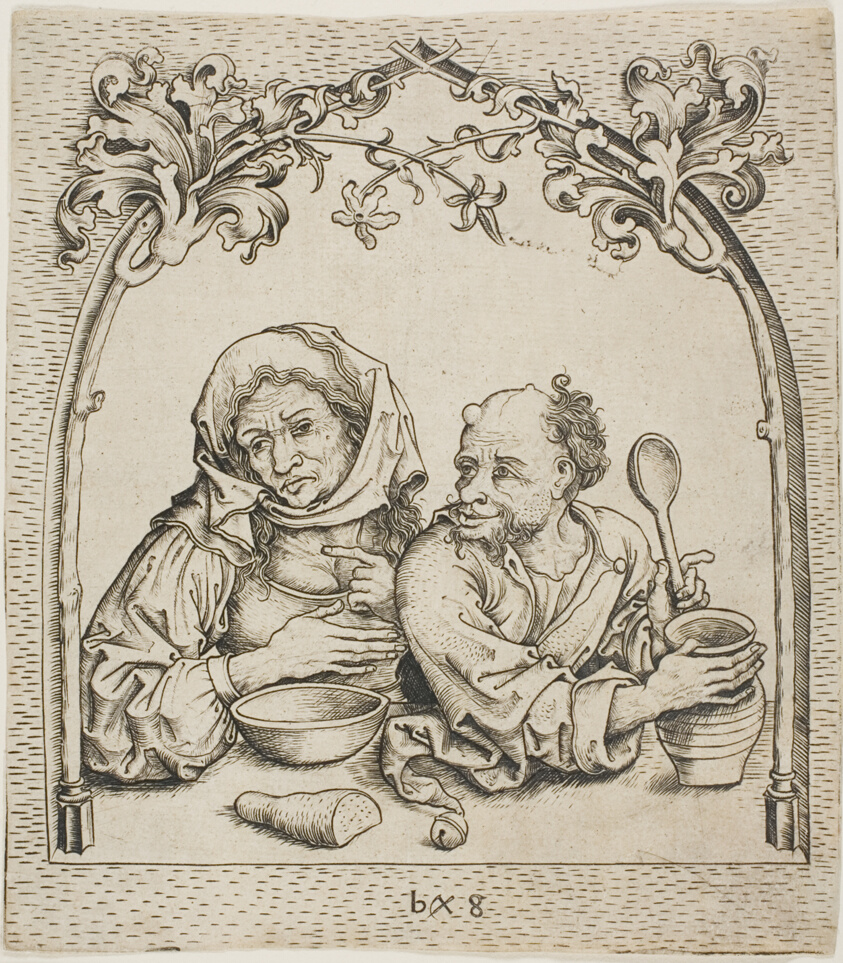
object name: Print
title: The Old Woman and The Fool in a Window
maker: Monogrammist b. g. (German, active about 1470–90)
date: c. 1480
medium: Engraving in black on ivory laid paper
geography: Germany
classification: engraving; print; prints and drawing